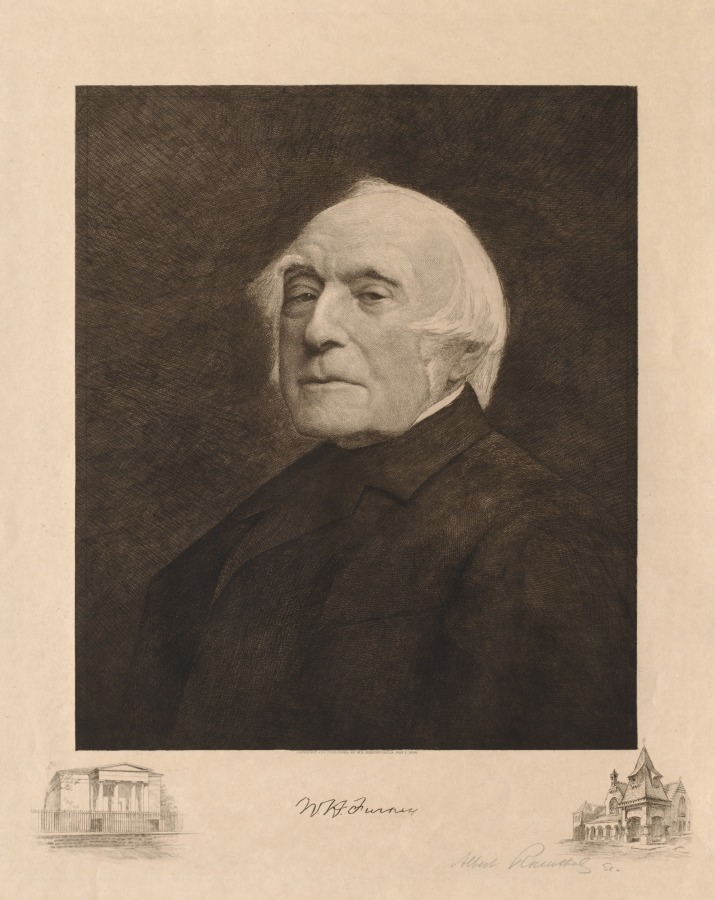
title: W. H. Furness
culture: America, late 19th Century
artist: Albert Rosenthal (American, 1863–1939)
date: 1896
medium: etching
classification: Print